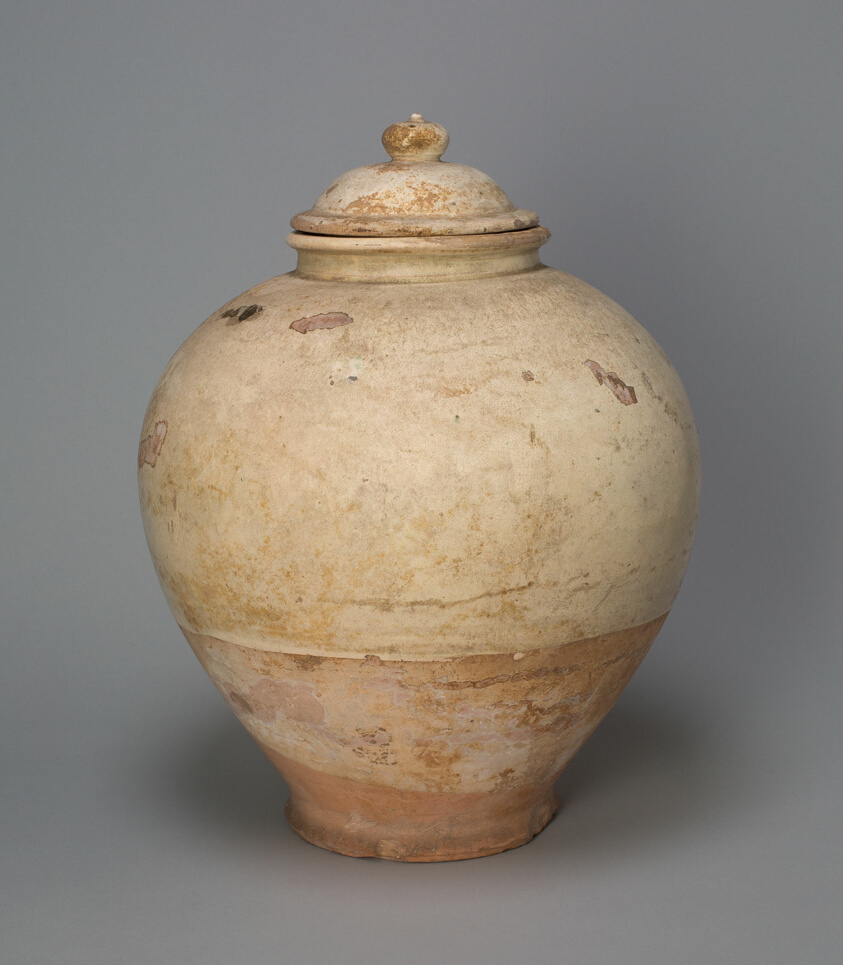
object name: Vessel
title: Covered Jar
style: Chinese (culture or style)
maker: China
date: Tang dynasty (618–906), early 8th century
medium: Slip-coated earthenware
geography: China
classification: earthenware; ceramics; sculpture; asian art; vessel